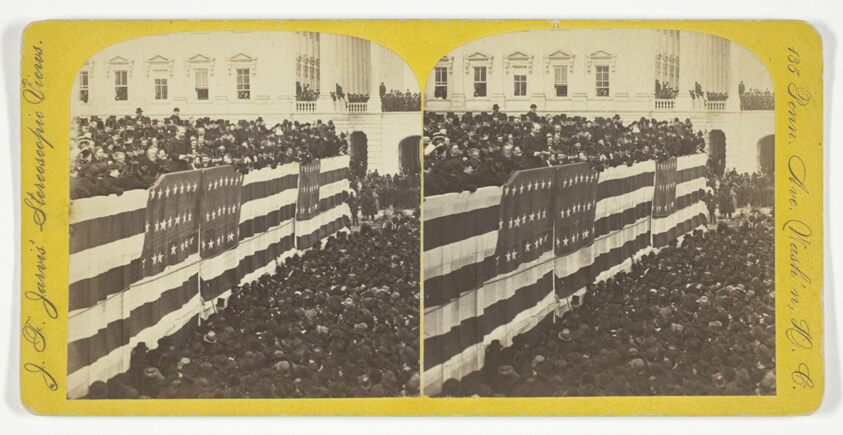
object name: Photograph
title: James Garfield on March 4, 1880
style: 19th century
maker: J. F. Jarvis (American, 1850-1931)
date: 1880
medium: Albumen print, stereo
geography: District of Columbia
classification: photography; photograph; albumen silver print; stereograph (albumen)